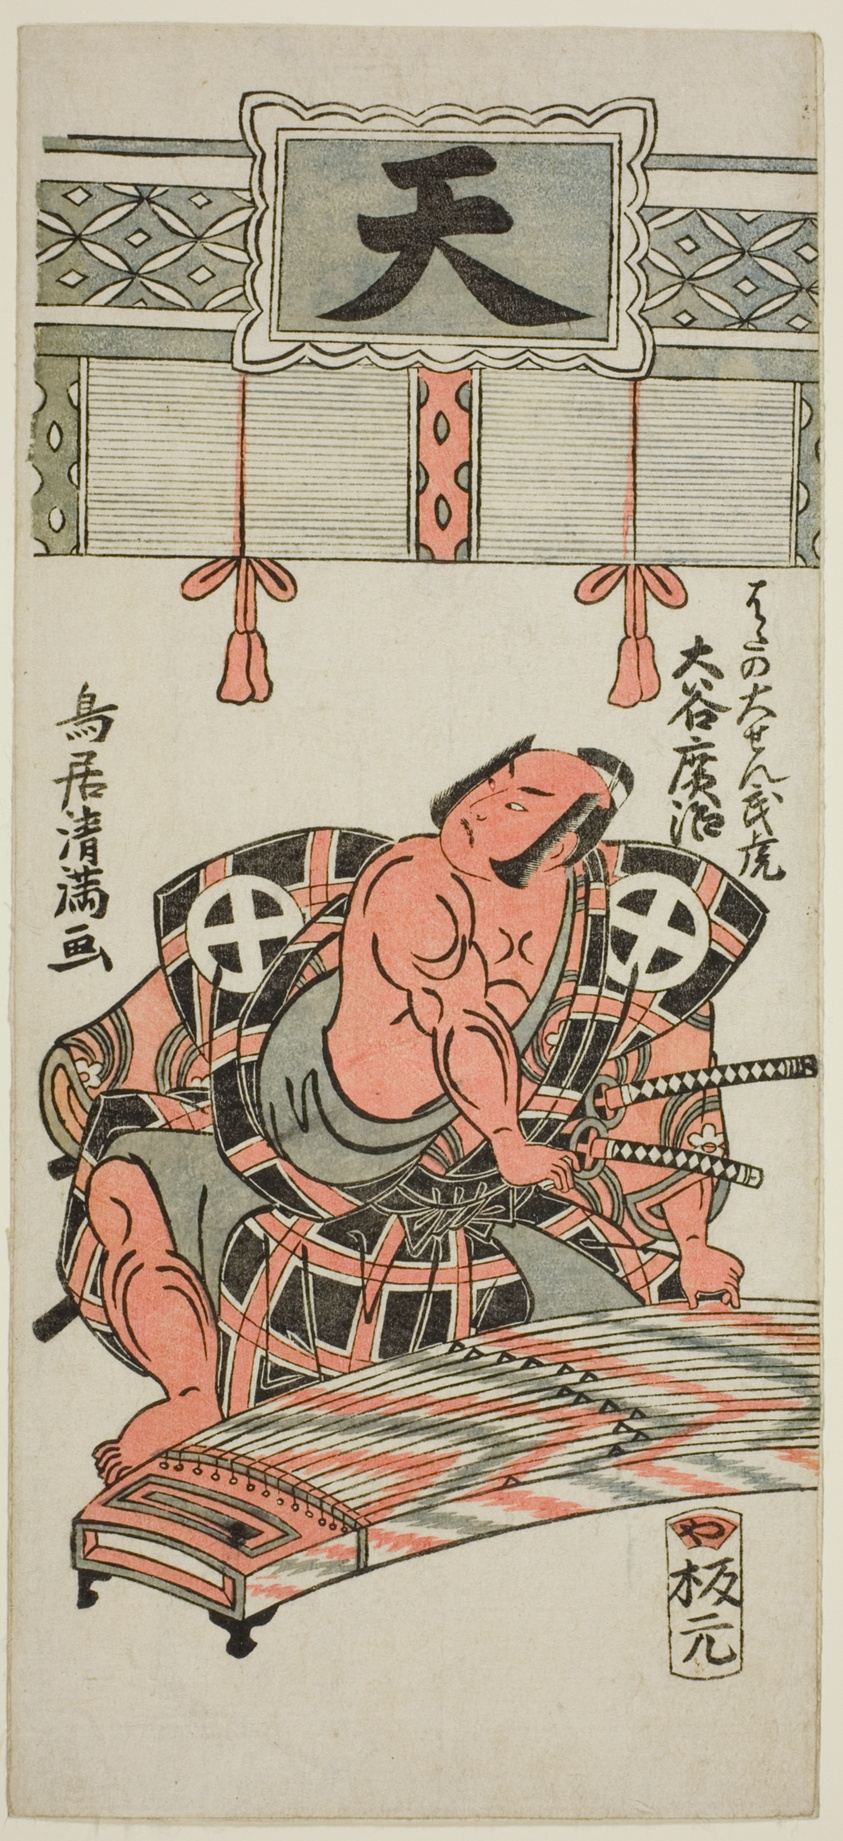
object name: Print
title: The Actor Otani Hiroji III as Hata no Daizen Taketora in the play "Kisoeuta Sakae Komachi," performed at the Ichimura Theater in the eleventh month, 1762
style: Japanese (culture or style)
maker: Torii Kiyomitsu I (Japanese, 1735–1785)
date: 1762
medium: Color woodblock print; hosoban, benizuri-e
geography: Japan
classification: woodblock print; print; asian art